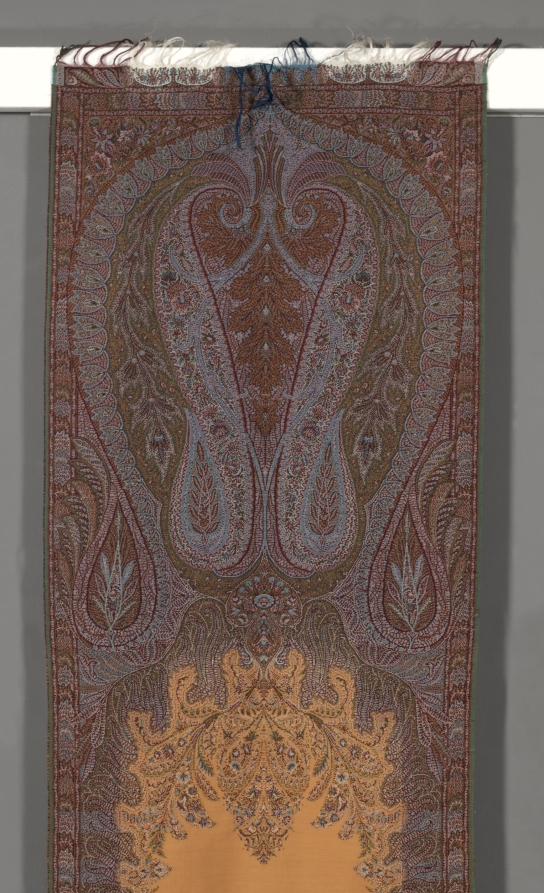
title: Long Stole with Botehs and Orange Center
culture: Austria, England, France, or Scotland, 19th century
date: 1850–55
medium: supplementary weft pattern, wool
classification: Textile